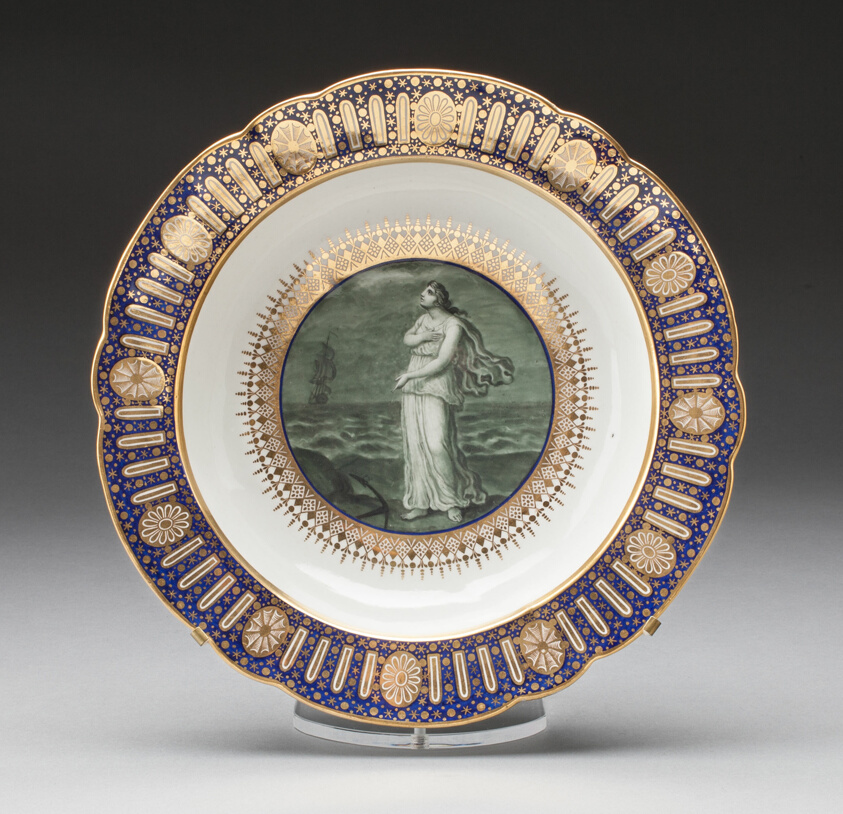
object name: Ceramics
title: Soup Plate from the "Hope Service" Made for the Duke of Clarence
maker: Worcester Porcelain Factory (Flight Period, 1783-1792); Worcester, England, founded 1751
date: c. 1792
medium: Soft-paste porcelain with blue enamel, monochrome gray, and gilding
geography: Worcester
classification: plate (general, dish); tableware; dish (vessel); porcelain; european decorative arts; ceramics